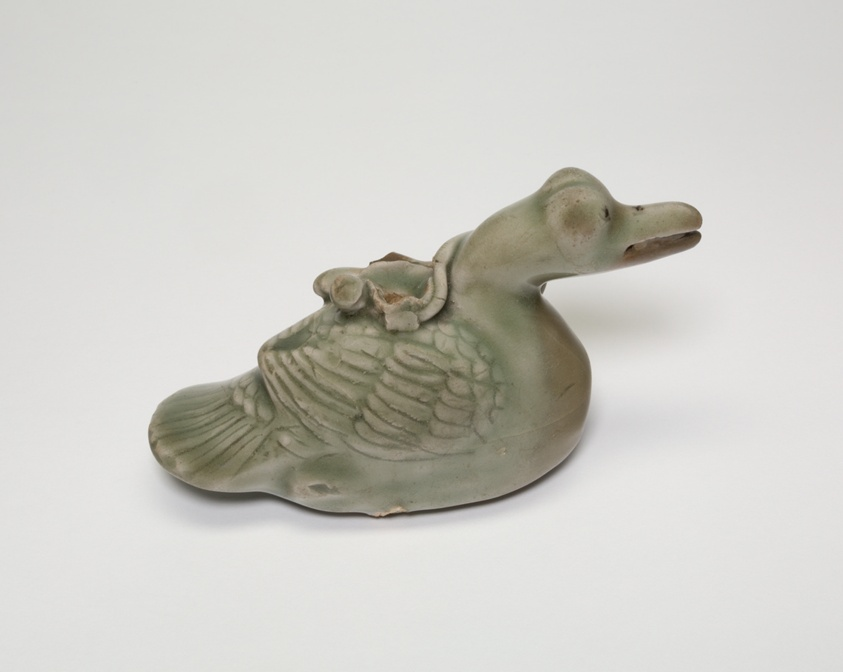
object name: Vessel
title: Bird-Shaped Water Dropper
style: Korean (culture or style)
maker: Korea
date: Goryeo dynasty (918–1392), mid–12th century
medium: Celadon-glazed stoneware with molded and incised decoration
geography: Korea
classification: ceramics; asian art; vessel